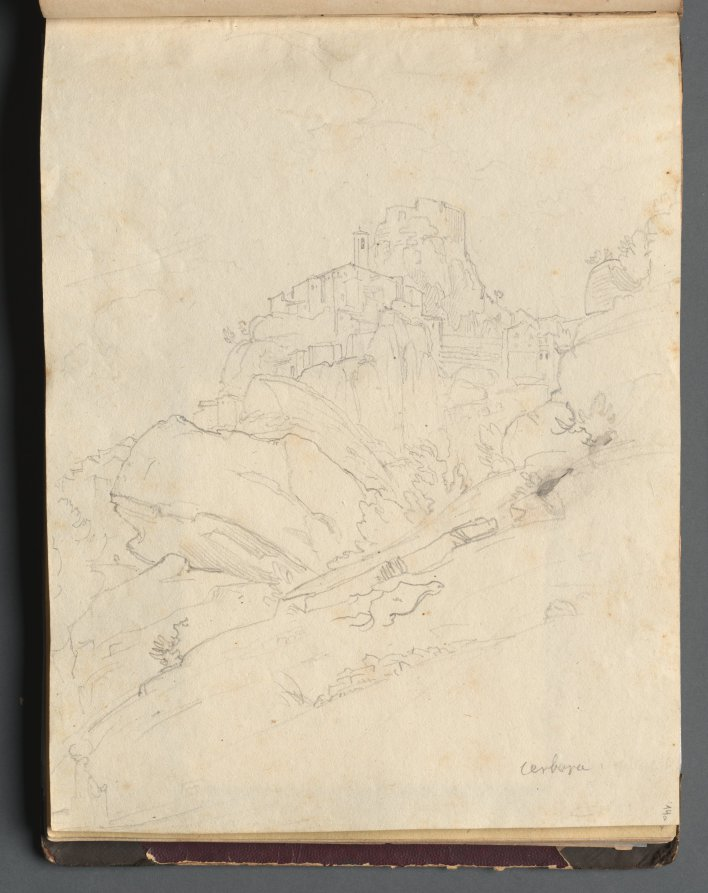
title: Album with Views of Rome and Surroundings, Landscape Studies, page 14a: "Cervera"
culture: Germany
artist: Franz Johann Heinrich Nadorp (German, 1794–1876)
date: c. 1830s-70s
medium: graphite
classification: Bound Volume